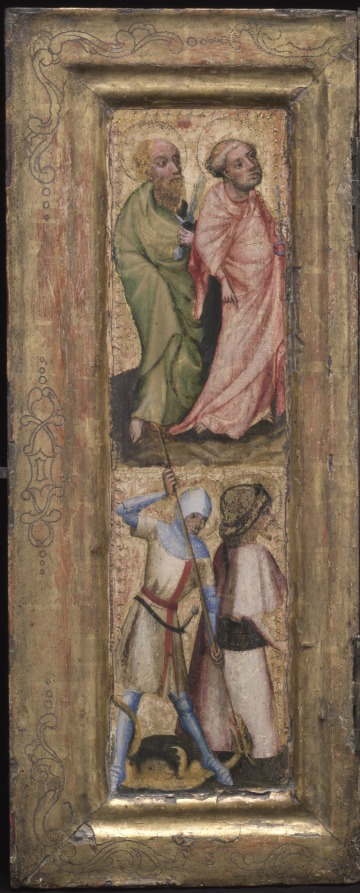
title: St. Peter, St. Paul, St. George, and St. James the Greater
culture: Austria, Salzburg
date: c. 1424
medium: tempera and gold on wood (oak)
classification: Painting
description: One wing of a small altarpiece, called a triptych, was undoubtedly made for private use.